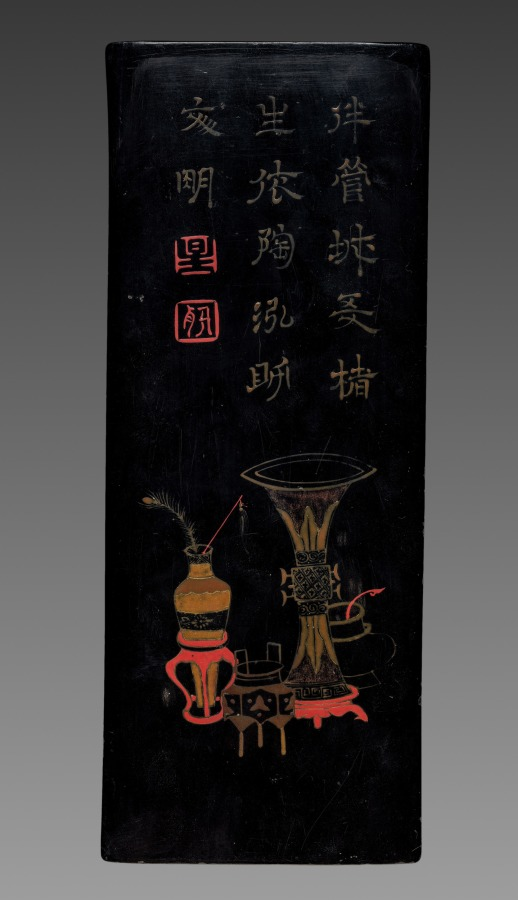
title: Ink Cake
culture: China, Qing dynasty (1644-1911)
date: 19th Century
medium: ink cake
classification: Miscellaneous